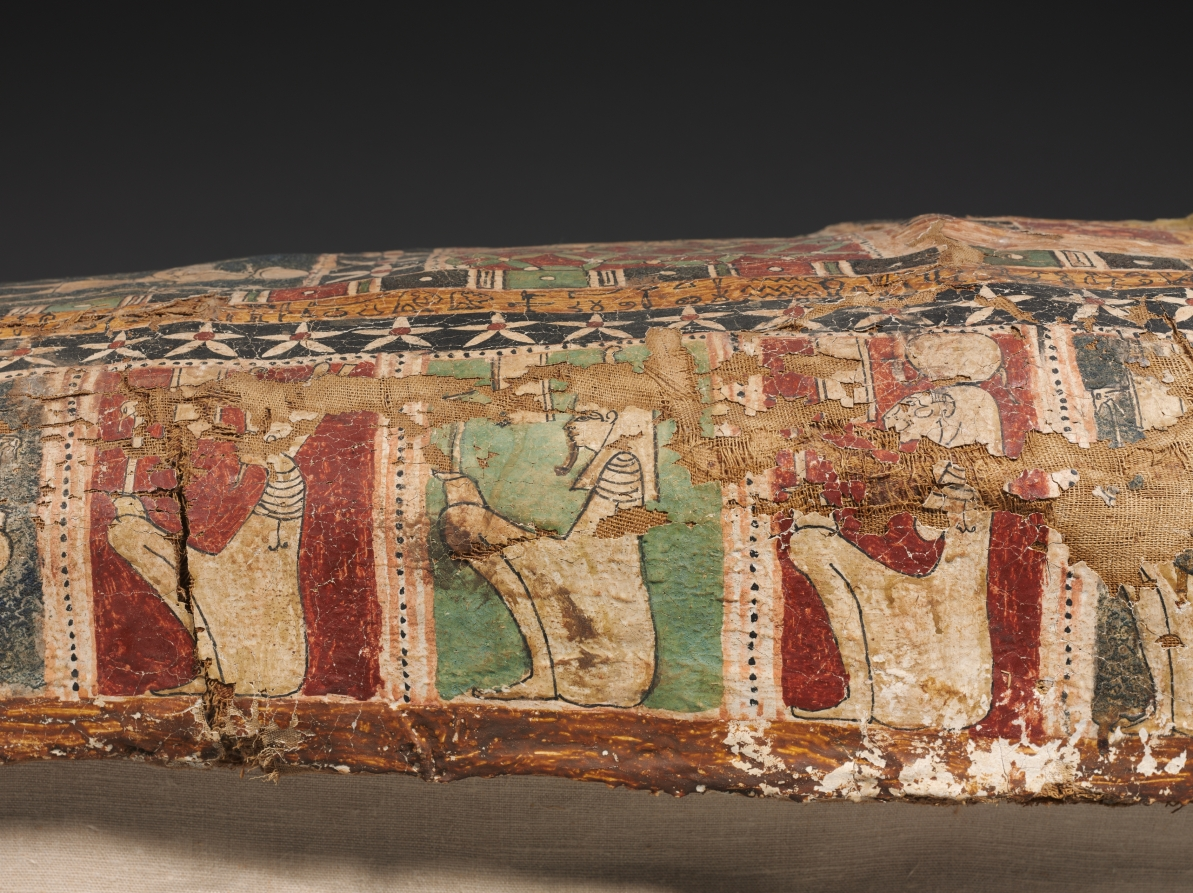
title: Cartonnage Mummy Case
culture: Egypt, Greco-Roman period (332 BCE–395 CE), Ptolemaic dynasty (305–30 BCE)–Roman empire (30 BCE–395 CE)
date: c. 50 BCE–50 CE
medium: cartonnage, painted and gilded, with glass inlays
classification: Funerary Equipment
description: This mummy case is made of cartonnage, a material similar to papier-mâché, but using layers of linen rather than paper. Cartonnage mummy cases such as these are contemporary with funerary portraits painted on wood or linen, although they present a very different appearance. The face, modeled in plaster, is bland and idealized, although the effect of the gilding and glass inlays is quite dazzling. The body is painted with traditional, age-old funerary motifs: the god Osiris, seated and mummiform; the fetish of Abydos, holy city of Osiris, flanked by standing deities (Thoth and Shu); a Horus falcon with outspread wings, and the bark of Sokar. Below these are the sandaled feet of the deceased. On the sides are rows of seated deities. On the top of the head are a winged scarab beetle flanked by Anubis jackals. On the foot are painted the soles of the deceased’s sandals, flanked by scorpions for protection.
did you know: This coffin is smaller and later in date than the other coffins in this gallery. It is made of cartonnage, which used layers of linen to create a material similar to papier-mâché. The painted portrait head displays the influence of Roman portraiture at this time and incorporates both gilding and glass inlays. Despite the fragile materials, this mummy case survived due to the very dry desert climate in which it was found.